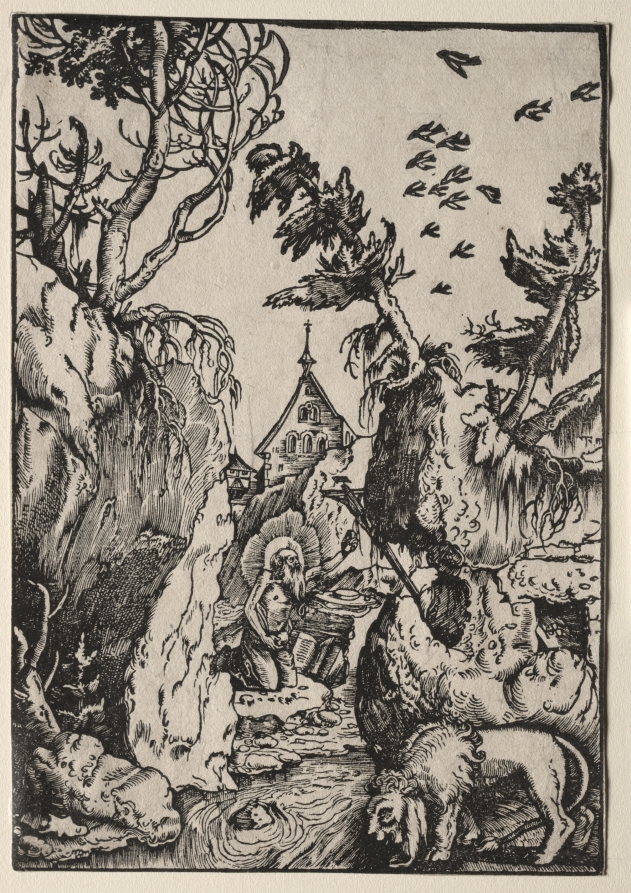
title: St. Jerome in the Wilderness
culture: Germany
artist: Hans Baldung (German, 1484/85–1545)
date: c. 1511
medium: woodcut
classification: Print